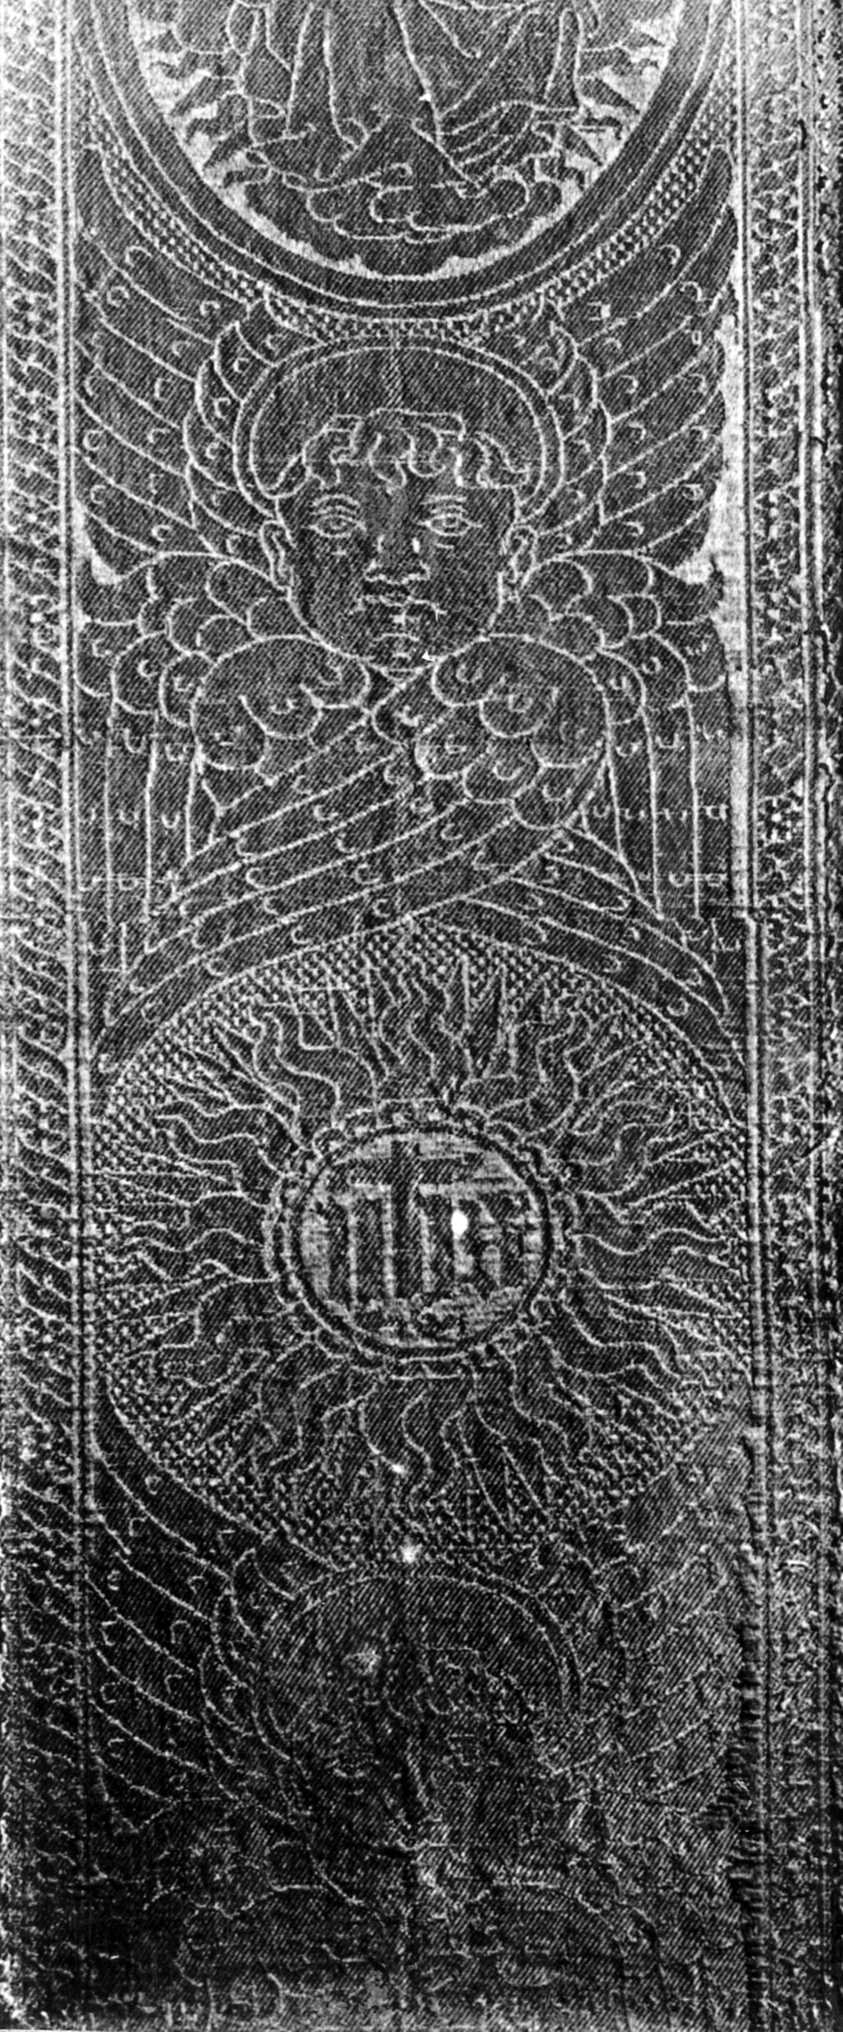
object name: Textile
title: Orphrey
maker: Italy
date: 16th century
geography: Italy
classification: textile; weaving; liturgical